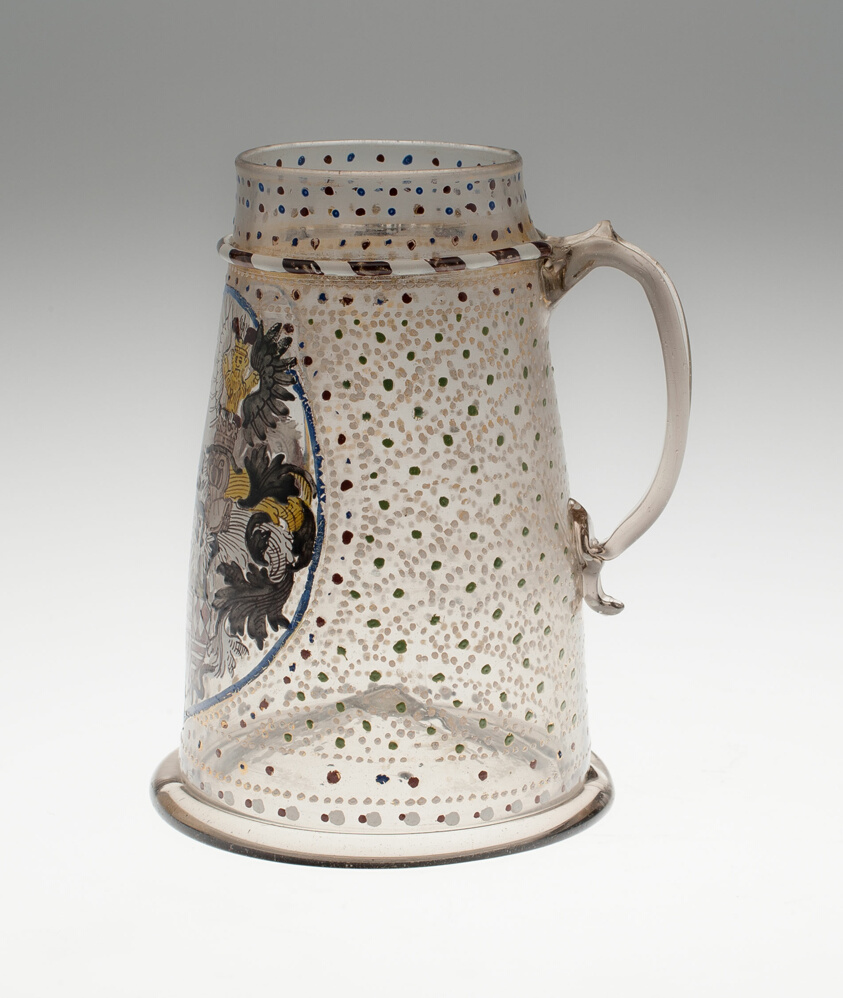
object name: Glass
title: Tankard with Mansfeld Arms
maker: German; probably Saxony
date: 1590/1600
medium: Colorless glass, enamel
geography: Saxony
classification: drinking vessel; glass; european decorative arts